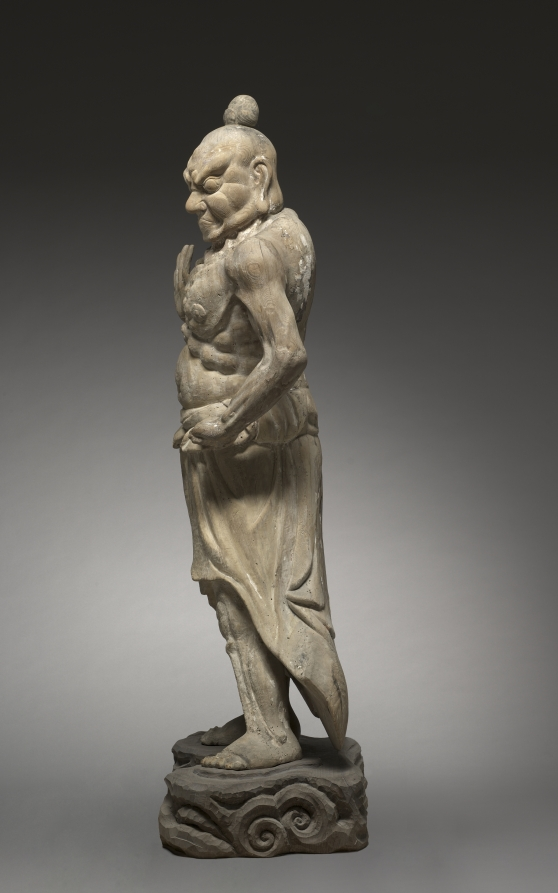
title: Guardian Figure: Nio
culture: Japan, Kamakura period (1185–1333)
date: 1200s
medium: chestnut and cypress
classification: Sculpture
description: A pair of guardians usually stands at the entrance of Japanese Buddhist temples. Traditionally, the pair included a closed-mouth figure, one hand displayed as if indicating his potential power, and an open-mouth figure, expelling his full force against evil spirits. Nio figures were usually displayed outdoors, often with just the roof of the entrance gate as protection, and as such were particularly susceptible to weathering.